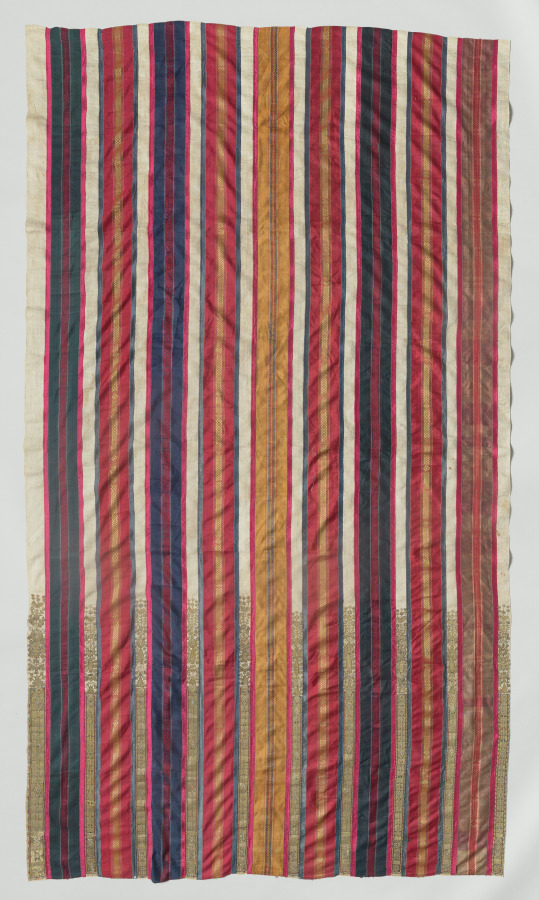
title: Curtain (one of a pair)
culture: Africa, North Africa, Tunisia, Djerba, Tunisian weaver(s) and embroiderer(s)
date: 1600s–1700s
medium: Silk, linen, metal, and dye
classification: Embroidery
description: One of a pair, this curtain displays colorful silk bands with woven geometric motifs, and cream bands with gold-embroidered plants, birds, six-pointed stars, and the khamsah (خمسة), an open five-fingered hand. Birds and the tree of life were popular good luck or fertility symbols linked to marriage. This curtain’s cosmopolitan motifs would have resonated with Jews, Muslims, and Christians alike, reflecting its creation on multiethnic and multireligious Djerba, an island off the Tunisian coast. There, both goldsmithing and gold thread embroidery were done by Jewish artisans (male and female, respectively). The fine materials suggest this curtain once hung in a wealthy home or for special occasions; interior wall hangings were typically made from rough wool.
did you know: When first acquired over a century ago, this curtain had fringe at its lower end.